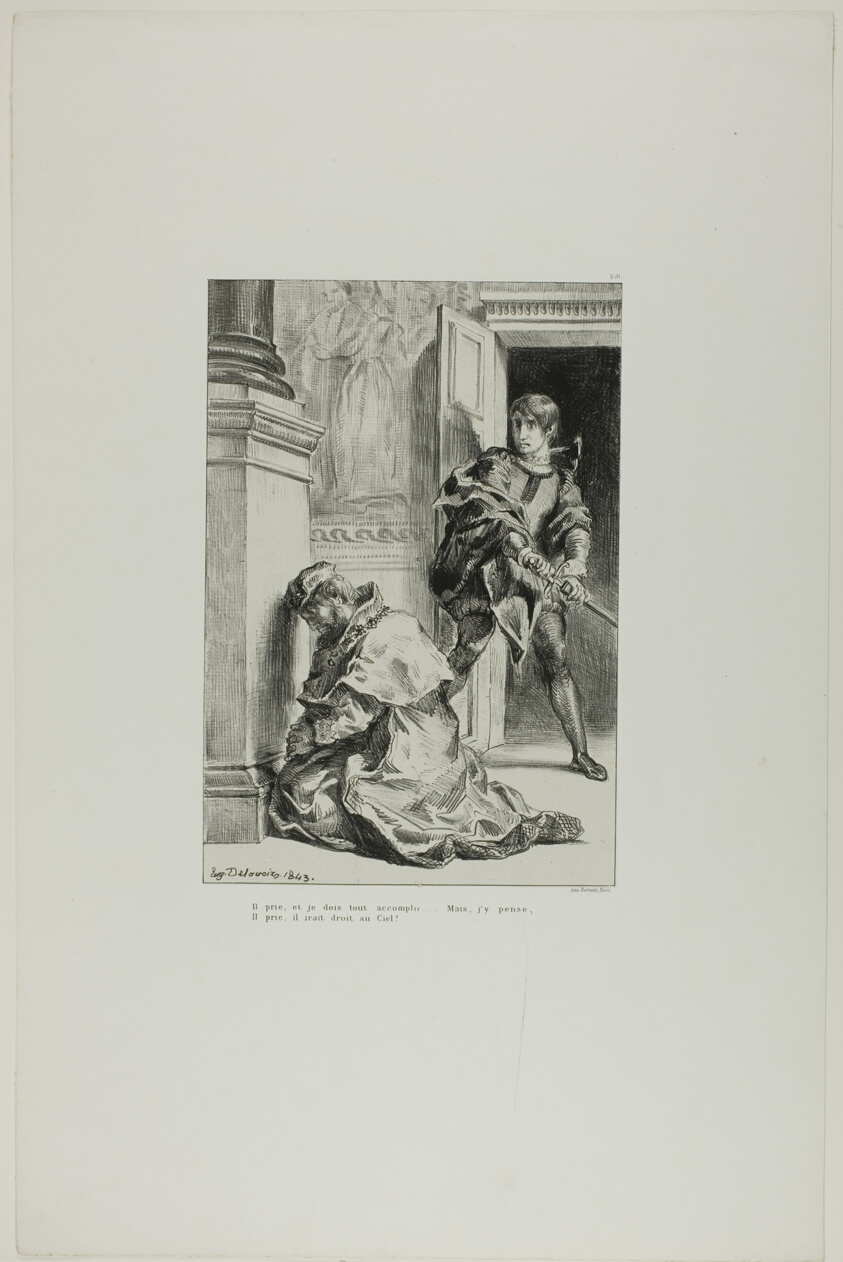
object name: Print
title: Hamlet Attempts to Slay the King, plate 8 from Hamlet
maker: Eugène Delacroix (French, 1798-1863)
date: 1843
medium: Lithograph in black on off-white China paper laid down on white wove paper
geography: France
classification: lithograph; print; prints and drawing